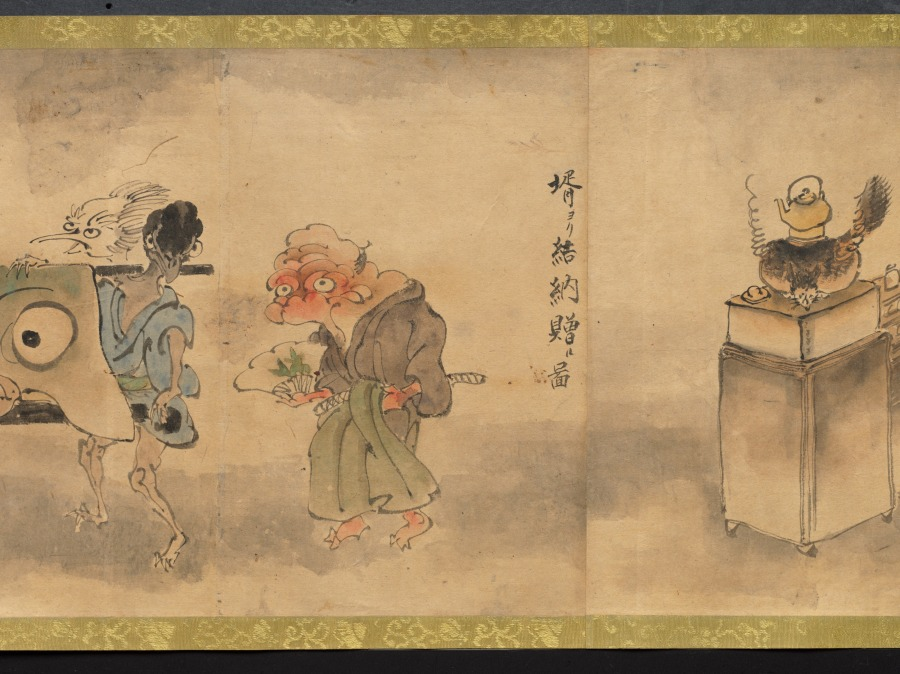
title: An Illustrated Marriage of Apparitions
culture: Japan, Edo period (1615–1868)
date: mid-1800s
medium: handscroll; ink and color on paper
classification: Painting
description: The matchmaking, engagement, wedding, and birth of the first child of two apparitions, or bakemono, literally "things that change," are illustrated in this whimsical, humorous handscroll. Japanese folklore abounds with such strange creatures, most famously represented in handscrolls featuring a procession of 100 supernatural monsters. Aside from a textual preface and cartouches indicating the content of the scenes, the tale is told visually. The artist and whereabouts of the original handscroll are unknown, but a number of other 19th-century copies by amateur painters exist in Japanese collections, attesting to its broad appeal.